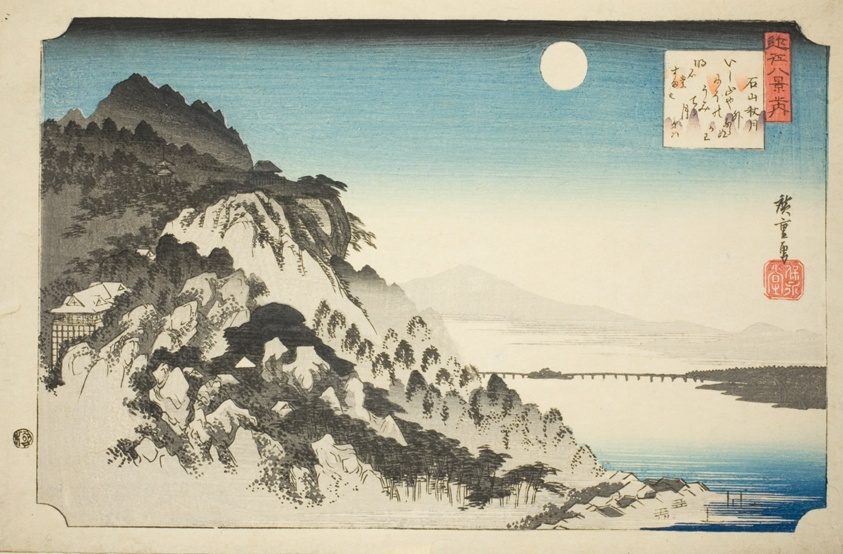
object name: Print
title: Autumn Moon at Ishiyama (Ishiyama shugetsu), from the series "Eight Views of Omi (Omi hakkei no uchi)"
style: Japanese (culture or style)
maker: Utagawa Hiroshige 歌川 広重; Japanese, 1797-1858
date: c. 1834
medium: Color woodblock print; oban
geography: Japan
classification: woodblock print; print; asian art